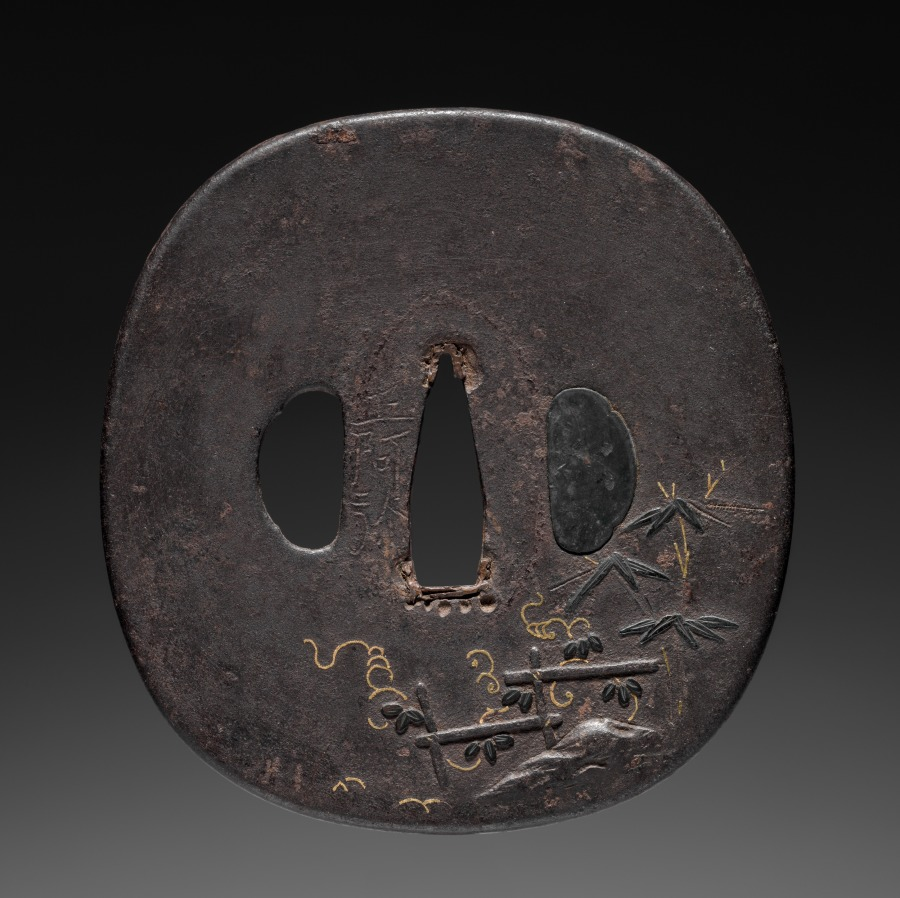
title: Sword Guard (Tsuba)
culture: Japan, Edo period (1615–1868)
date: early 1800s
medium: iron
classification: Arms and Armor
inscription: Signature: 正阿弥